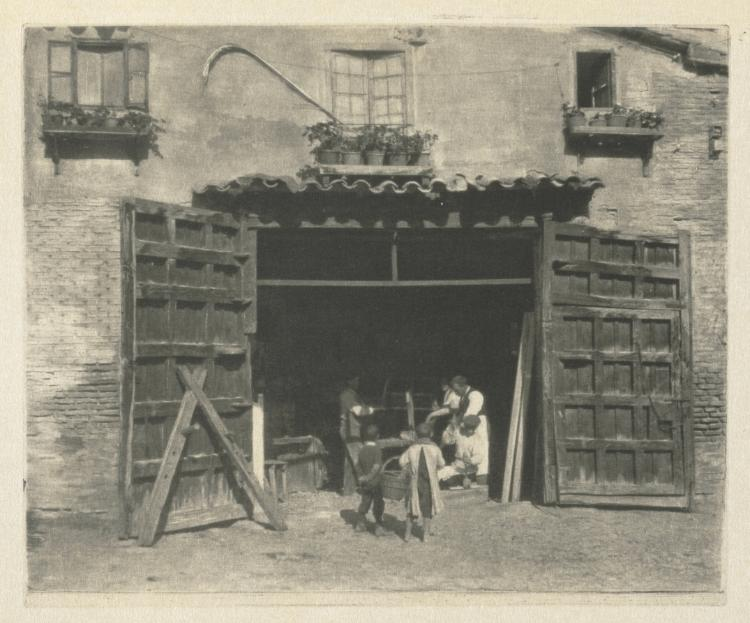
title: Camera Work: A Carpenter's Shop - Toledo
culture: England, 20th century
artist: J. Craig Annan (British, 1864–1946)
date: 1914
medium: photogravure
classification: Bound Volume